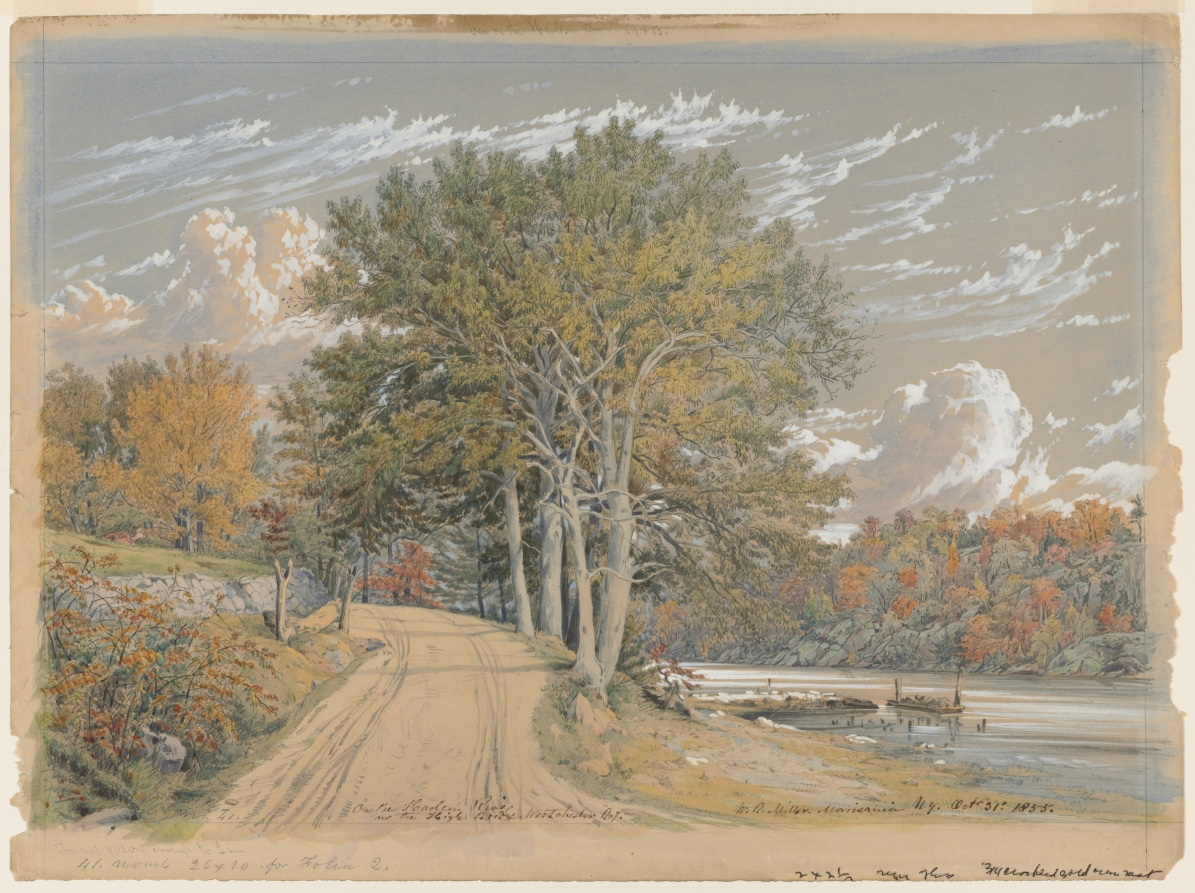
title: On the Harlem River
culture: America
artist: William Rickarby Miller (American, 1818–1893)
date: 1855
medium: watercolor with gouache, over graphite, framing lines in graphite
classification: Drawing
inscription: signed, lower right, in brown ink: W. R. Miller. Morrisania N Y. Octr 31t. 1855.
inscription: in brown ink, lower center: On the Harlem River / nr the High Bridge. Westchester CoY.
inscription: in graphite in lower left above framing line: 41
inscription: in graphite, mount 26 x 20 for Folio 2.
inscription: upper center: View on the Harlem River. 19 x 13.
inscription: in graphite, lower left: Tree not Yellow enough to [Sun?]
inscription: in black ballpoint pen, lower right: 2 x 2_ [regu?] glass '_ cracked Gold [cream?] mat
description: When William Rickarby Miller arrived in America from England in 1845, he found watercolor painting in a dismal state—“a branch of Painting scarcely at all cultivated here.” Nonetheless, Miller made his living producing watercolors for print publications, depicting picturesque American woodlands with the staid British technique of his training. In On the Harlem River, Miller overlays delicate graphite line work with tints of luminous watercolor and dense gouache, capturing the color and light effects of a crisp autumn day. His meticulous transcription of individual leaves, branches, and stones displays his technical finesse, as well as his interest in documenting the particularities of nature. He shared this preoccupation with the Hudson River School, a mid-century American landscape painting movement whose members used detailed, on-site drawings of natural subjects as aids in making oil paintings. Miller’s great innovation was to marry the Hudson River manner to the medium of watercolor, anticipating the landscapes of American watercolorists in the decades to follow.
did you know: The tall trees at the center of Miller’s composition appear to be American sycamores, deciduous trees with creamy bark and spiky round fruit that grow in moist soil near streams and riverbanks.